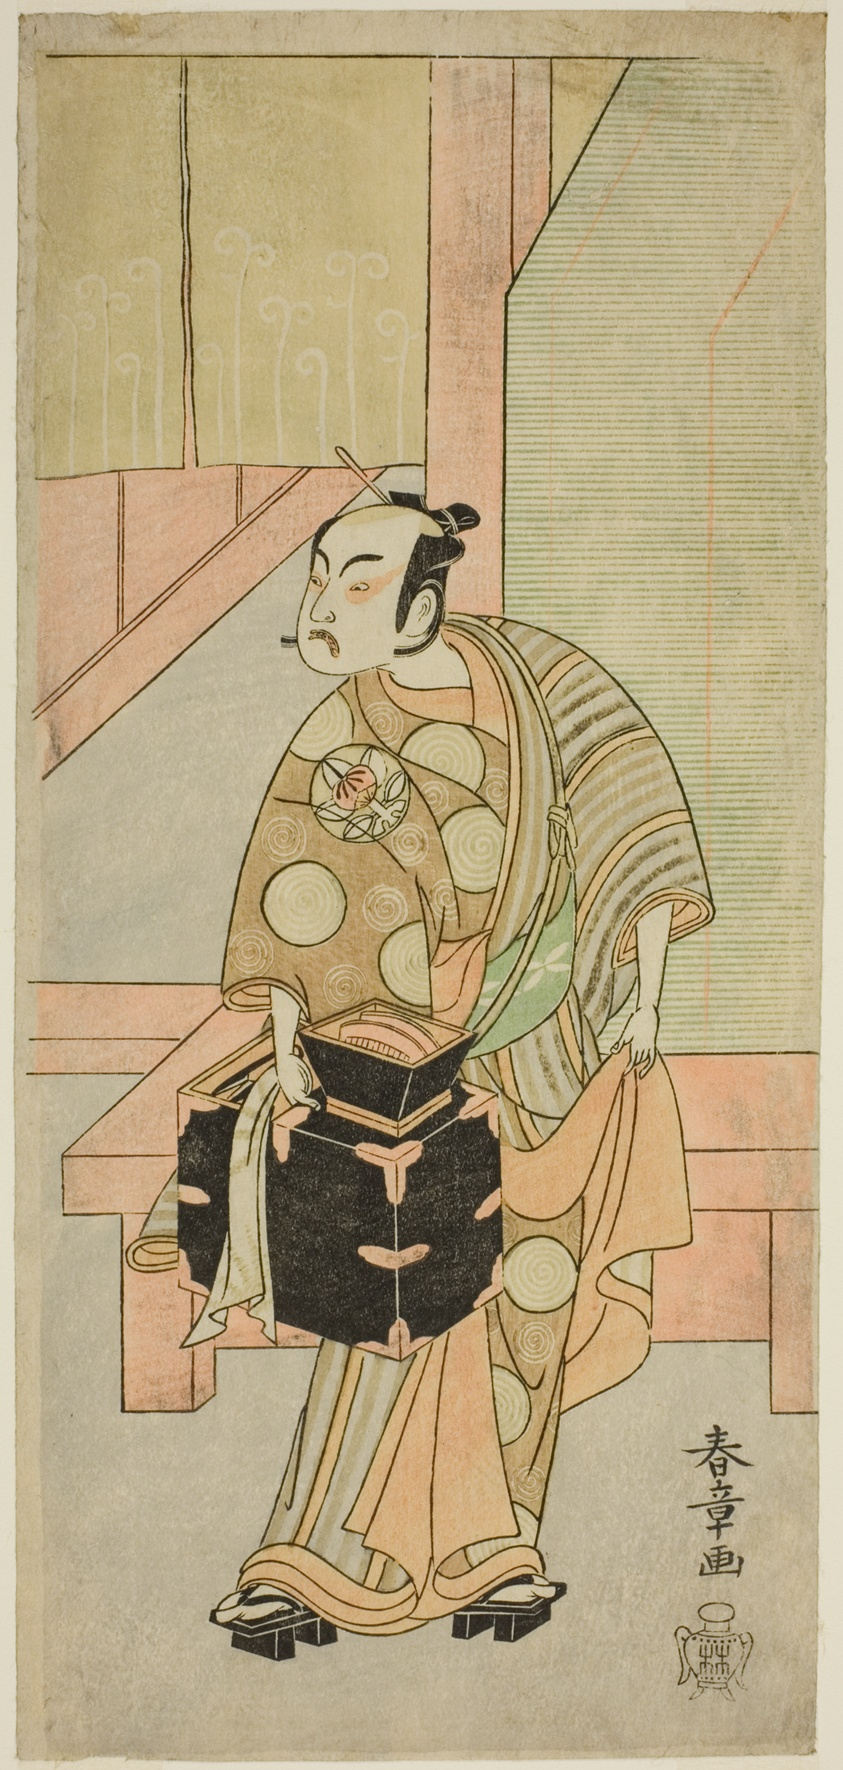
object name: Print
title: The Actor Ichimura Uzaemon IX as the Hairdreser Komagata Ikkaku in the Play Fuji no Yuki Kaikei Soga, Performed at the Ichimura Theater in the First Month, 1770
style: Japanese (culture or style)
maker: Katsukawa Shunsho 勝川 春章; Japanese, 1726-1792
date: c. 1770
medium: Color woodblock print; hosoban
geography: Japan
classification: woodblock print; print; asian art